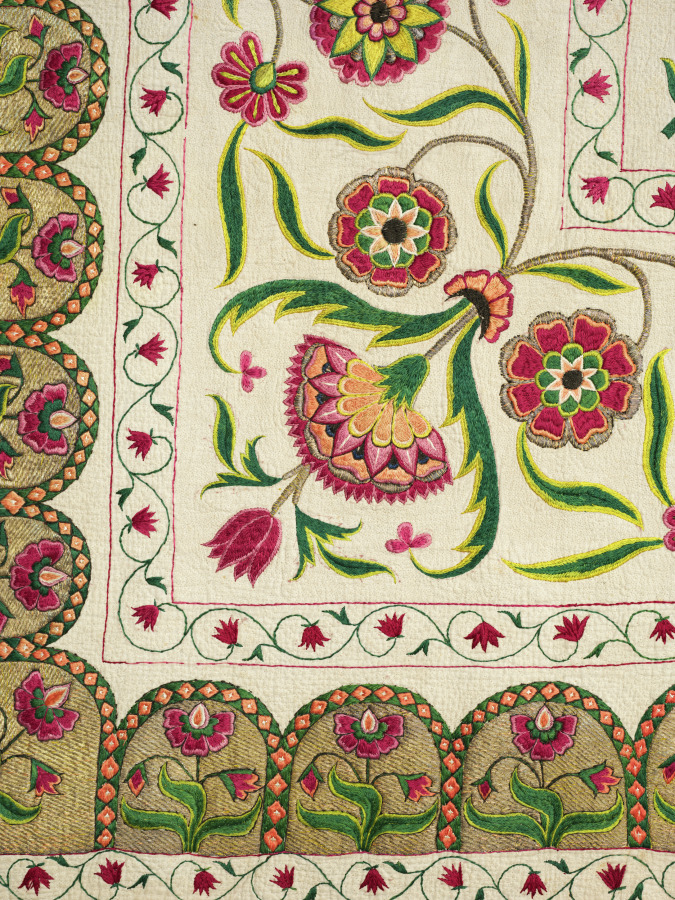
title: Spread with floral medallion pattern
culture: Mughal India, Deccan, probably Goa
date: 1700s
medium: Cotton: plain weave, quilted; silk and gilt-metal thread: embroidery, couched laid work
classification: Embroidery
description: This textile could have been used as a covering for seating on the floor or as a bedspread in either an Indian or European setting. In any case, it was not meant to be walked on. Its material and imagery testify to flourishing international relationships. The arabesque designs, consisting of swirling vines with large and small flowers, recall a radiant paradise and have roots in Persian, Chinese, and Mediterranean sources. The use of gold-wrapped thread had been widespread in Spain and Portugal before it was adopted in India, probably first in Goa, a Portuguese colony on the southwestern coast of India from 1510 to 1961. The vibrant colors are distinctive to this region of India.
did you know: A small blue and yellow bird perches at the center of the otherwise solely floral design.